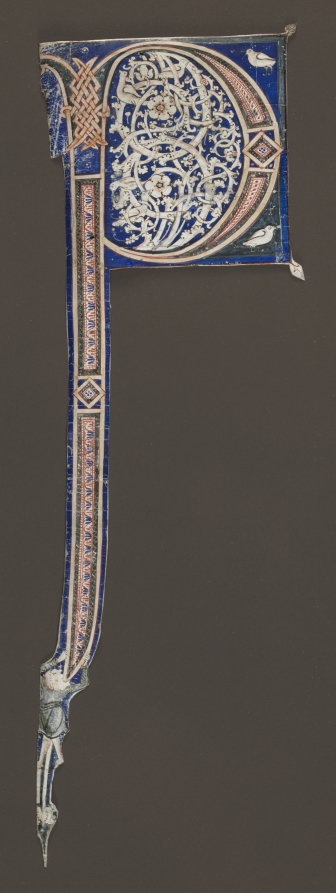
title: Decorated Initial (P) (Excised from a Bible?)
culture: Italy, Tuscany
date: c. 1150–60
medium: tempera on parchment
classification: Manuscript